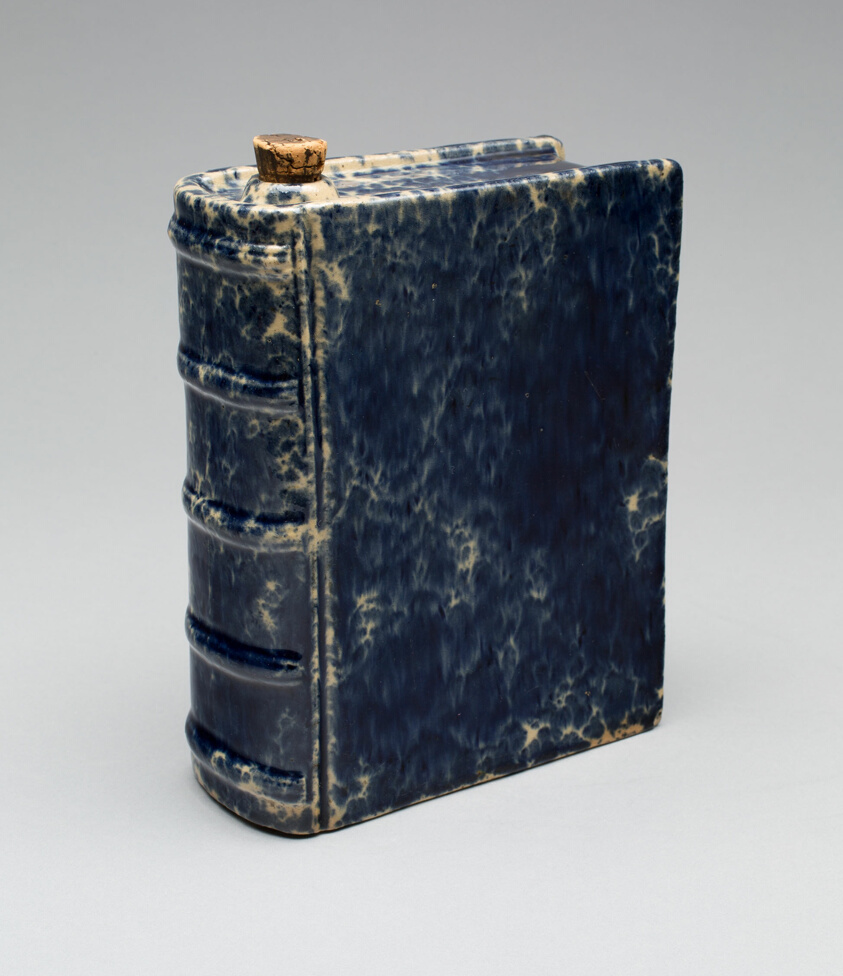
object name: Decorative Arts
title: Flask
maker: Artist unknown (American, 19th century)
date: 1840–60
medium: Earthenware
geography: Bennington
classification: vessel; bottle; ceramics; american decorative arts; american arts; decorative arts